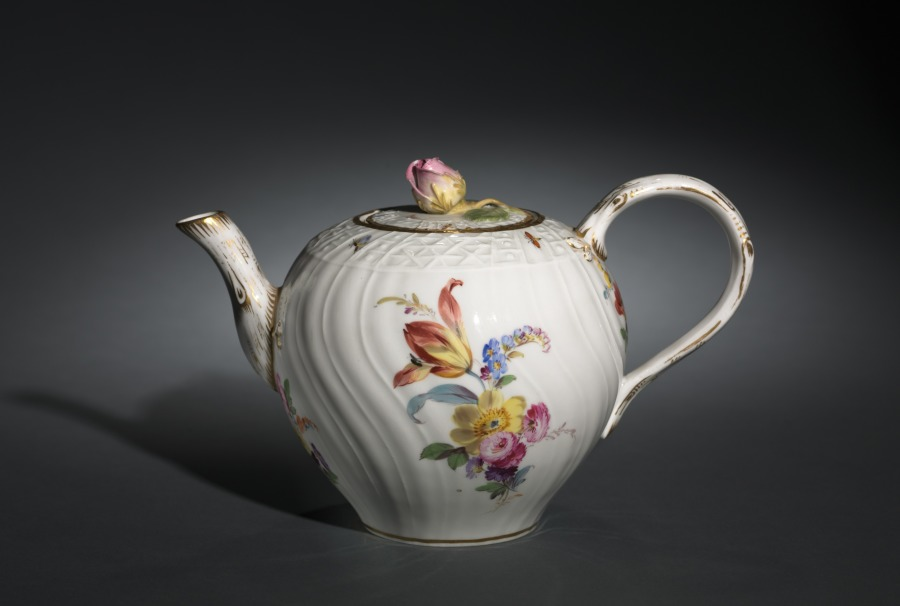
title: Teapot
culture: Germany, Meissen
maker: Meissen Porcelain Factory (German, est. c. 1710)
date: c. 1750–70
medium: porcelain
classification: Ceramic